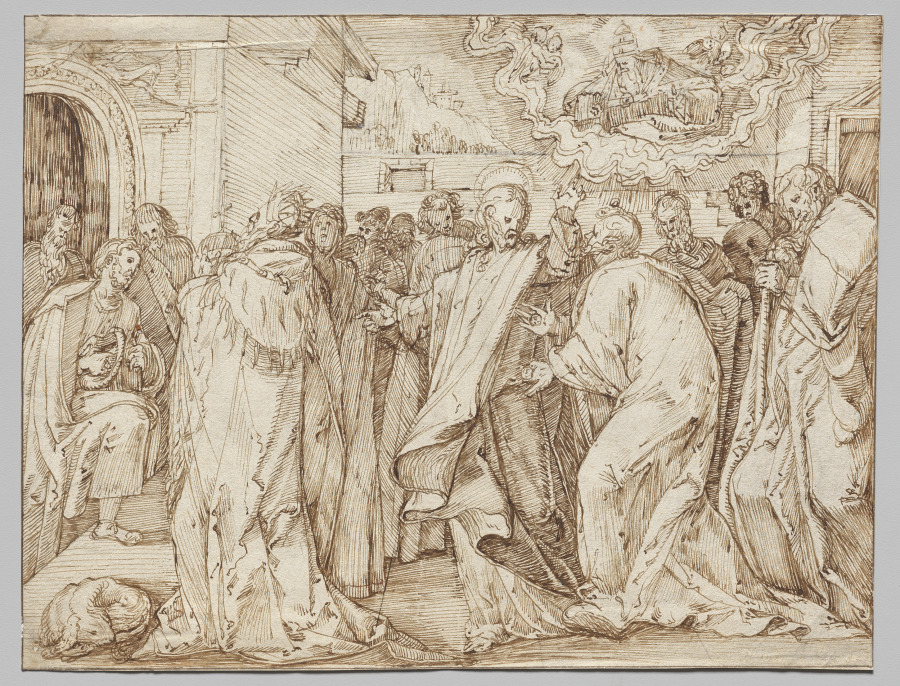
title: The Parable of the Tribute Money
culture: Netherlands, late 16th Century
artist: Master of the Egmont Albums (Netherlandish, 1480-1620)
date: c. 1580–1600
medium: Pen and brown ink, traces of pen and black ink and black chalk, on paper; framing lines in brown ink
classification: Drawing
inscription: falsely signed, lower right, in brown ink: Hans van Aken fecit. [abraded, visible under UV] ; VERSO, right center, in graphite: 259 ; lower left, in graphite: 641 M. 244 / (1V7) ; lower left, in graphite: PMG ; lower right, in graphite: 2063 [circled] ; lower right, in graphite: [illegible] [partially erased] ; lower right, in graphite: [illegible] [partially erased] ; lower right, in graphite: 239. ; lower right, in graphite: 53 [crossed out]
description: The New Testament parable of the tribute money addresses the division between worldly and divine power. Here, the artist depicted Christ in the center of a civic square with one hand pointing toward a king wearing a crown and an ermine robe and the other toward God above. Encouraged by Christ’s words to show each authority its due, the crowd shows deference to both the king and God via facial expression, pose, and gesture. Parables were enduringly popular on prints, stained glass, and decorative objects for their relevance to the issues and choices made by everyday citizens.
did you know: The pose of the kneeling man and the decoration of the door surround in this drawing are both based on details in a woodcut made earlier in the century by the German artist Albrecht Dürer.